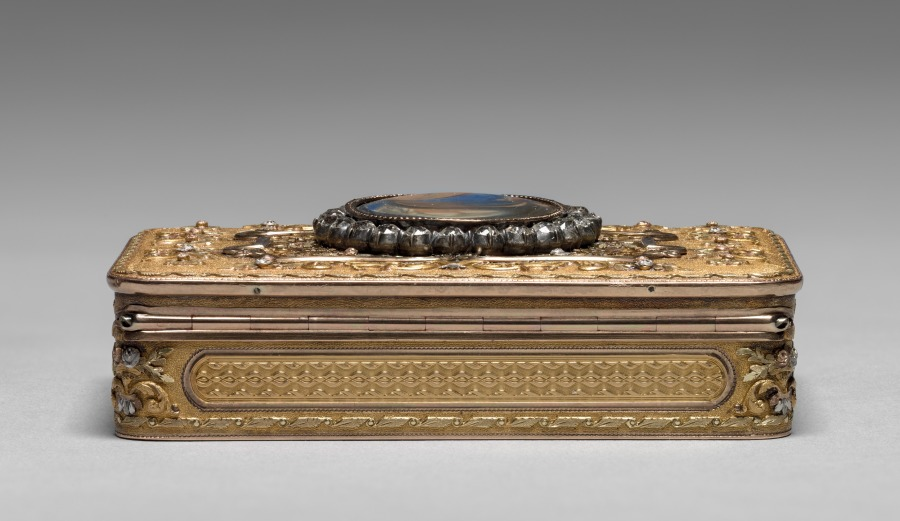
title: Portrait of a Man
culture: Switzerland, Neufchatel, mid-19th century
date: mid 1800s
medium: watercolor on ivory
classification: Miscellaneous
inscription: signed: "B."